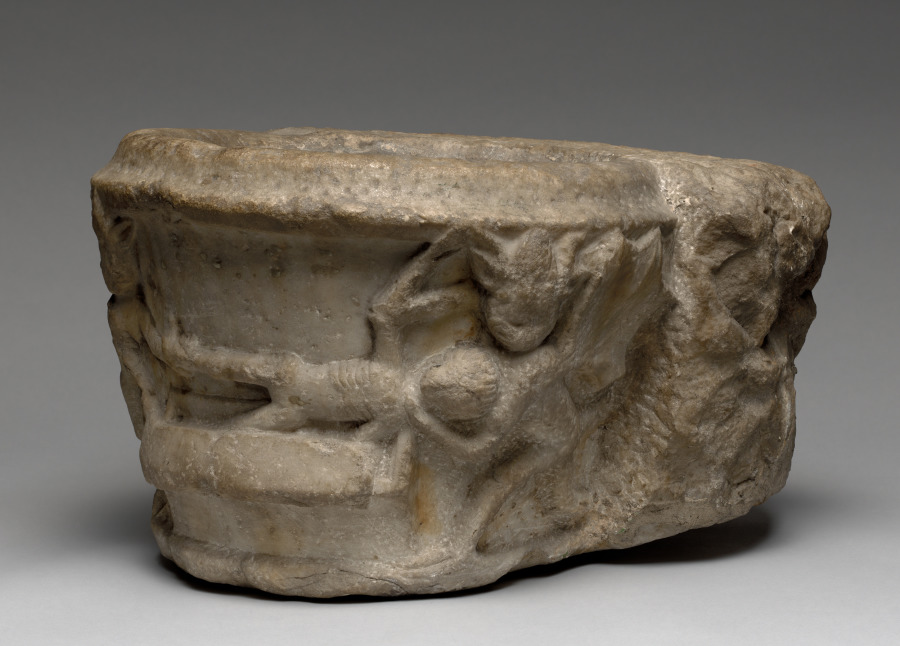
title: Holy Water Font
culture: Southern France, late 15th century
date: late 1400s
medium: marble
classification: Sculpture